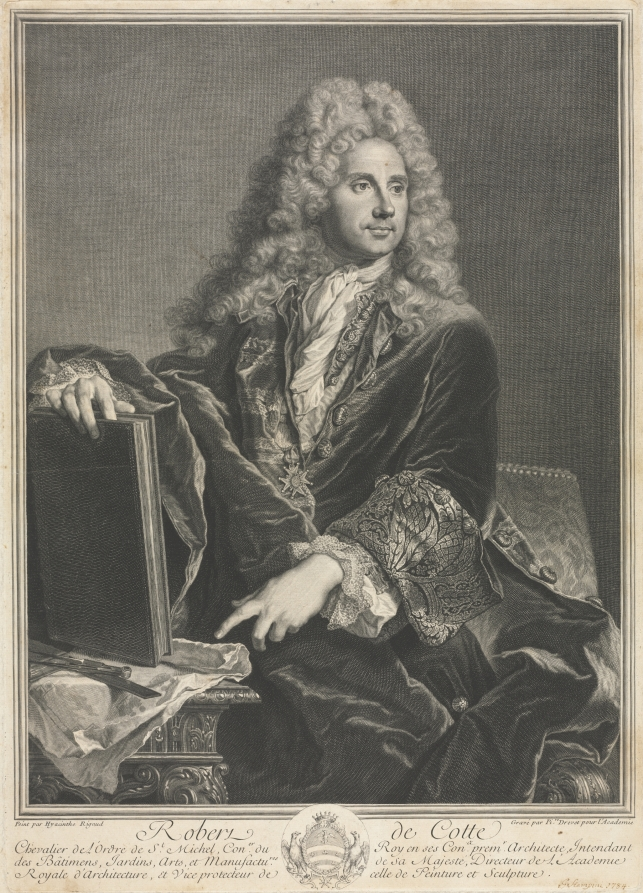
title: Portrait of Robert de Cotte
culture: France, 18th century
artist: Pierre Drevet (French, 1663–1738)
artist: after Hyacinthe Rigaud (French, 1659–1743)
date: 1722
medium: engraving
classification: Print